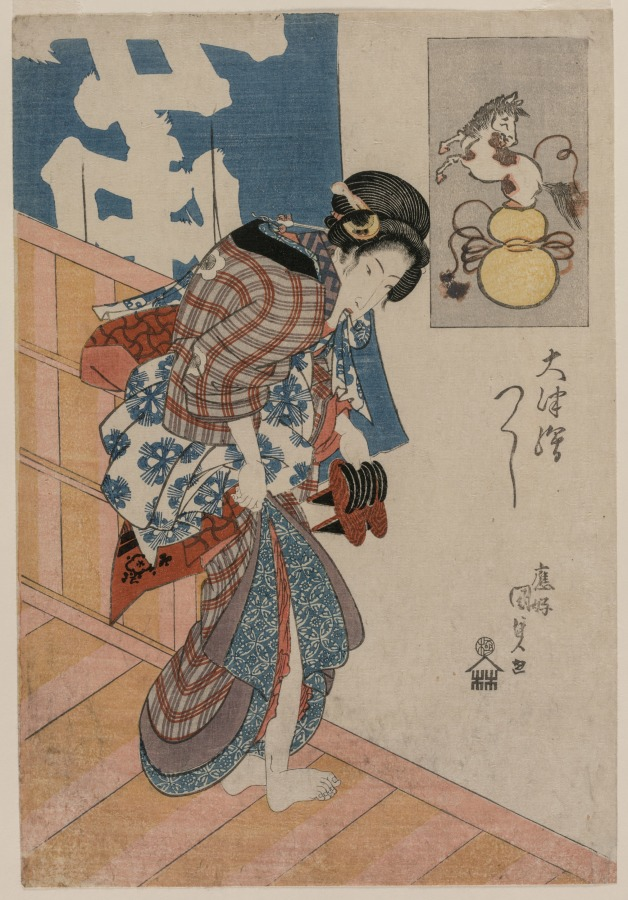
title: Woman Leaving a Bath House (from the series Pictures from Otsu)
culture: Japan, Edo period (1615–1868)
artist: Utagawa Kunisada (Japanese, 1786–1865)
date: c. mid 1820s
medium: color woodblock print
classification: Print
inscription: Signature: Oko (konomi ni ojite) Kunisada ga Publisher: Iseya Rihei (emblem) Censorship Seal: kiwame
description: The image of a horse emerging from a gourd in the upper-right corner alludes to the story of the Daoist immortal Chokaro. It was a popular subject of otsu-e folk paintings.